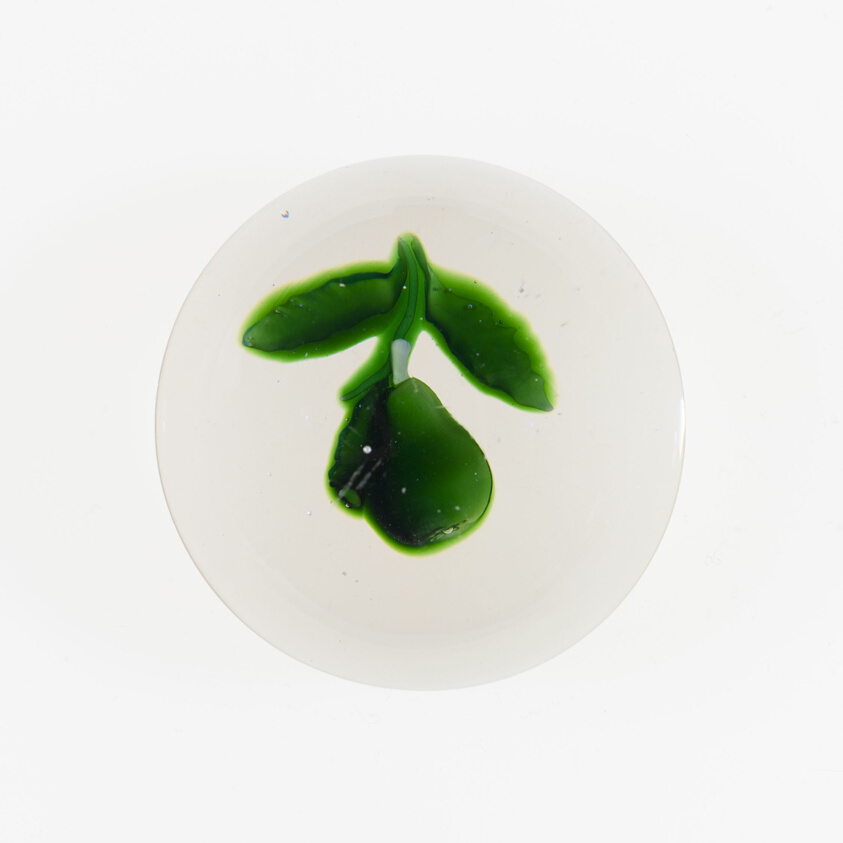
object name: Glass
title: Paperweight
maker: Baccarat Glassworks (Cristalleries de Baccarat); Lorraine, France, founded 1764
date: 19th century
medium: Glass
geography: France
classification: paperweight; glass